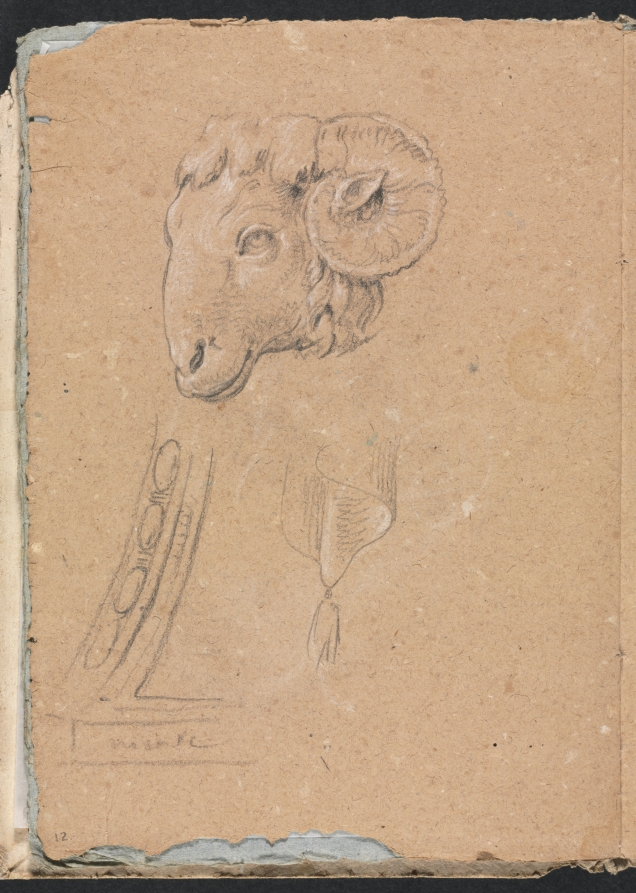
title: Verona Sketchbook: Ram's head (page12)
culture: Italy, 18th century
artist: Francesco Lorenzi (Italian, 1723–1787)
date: 1760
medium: black chalk with white heightening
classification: Bound Volume